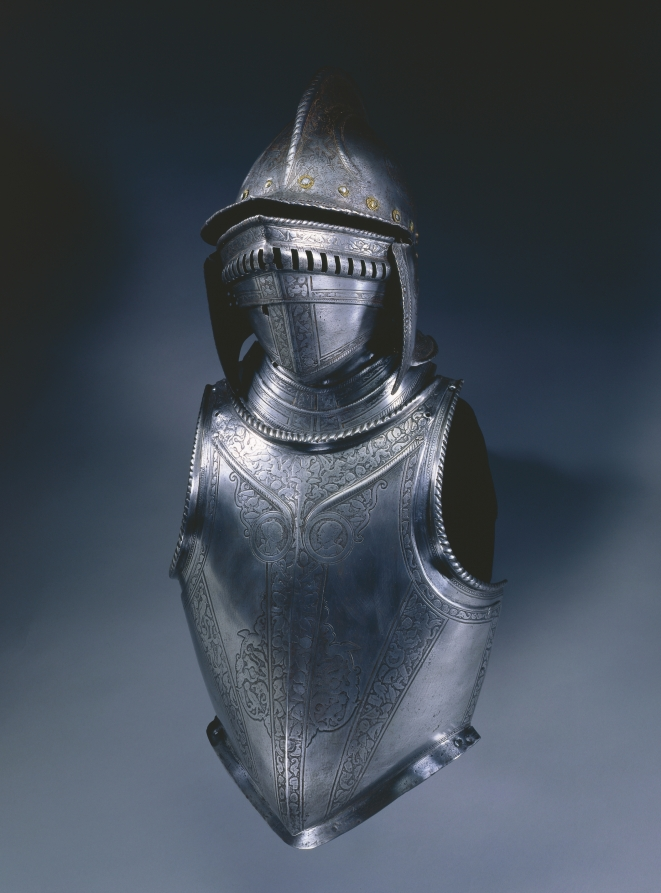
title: Burgonet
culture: North Italy, 16th century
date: c. 1550–1600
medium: steel, etched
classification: Arms and Armor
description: Shown here together is a burgonet, buffe, and breastplate all decorated with a technique known as etching. A burgonetis a light open helmet characterized by a peak, a fall over the eyes, and hinged earpieces. The face is protected by the addition of a buffe, a sperate detachable element worn with the open helmet that extends to the throat. It connects to the breastplate which protects the abdomen and is worn with a backplate.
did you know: Etching is a technique where either the design or its ground is bitten into the metal surface with acid, the rest being protected by a protective wax or varnish.